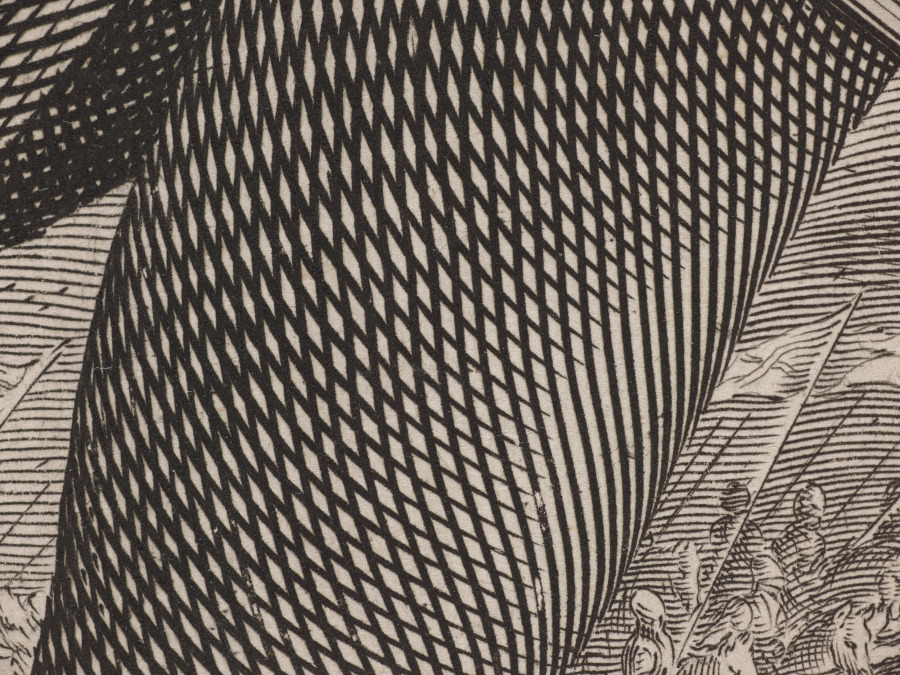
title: Bellona Leading the Armies of the Emperor against the Turks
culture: Netherlands, early 17th Century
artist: Jan Muller (Dutch, 1571–1628)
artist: after Bartholomaeus Spranger (Flemish, 1546–1611)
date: 1600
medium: engraving (printed from two plates)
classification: Print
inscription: lower left, in plate: B. Sprangers invent. / Ioan.Muller.sculp. ; across bottom, in plate: Serenissimo Principi Domino D[n?]o MATHIÆ, Archiduci Austriæ, Duci Burgundiæ, Stiriæ, Carinthiæ, Carniolæ et Wirtembergæ etc. Comiti Tirolis etc. Nec non / Generali et supremo totius Christiani exercitûs contrà Turcas Duci ac Præfecto foelicissimo, D{n?]o suo clementissimo, Bartholomæus Spranger. S.C.M.Pictor D.S. [in engraved script] ; across bottom, in plate: En Bellona ciet turmas procùl ære canôro, / Spicula Marte vibrat dextro, succinctaque flagris / Bella fremit, fremebunda parat, gaudetque paratis. / Nec mora, feruet opus, Iouis ales prælia miscet / Quid dubitet? Bona caussa facit. Caducifer inquit: / Macte animis: caussarum sum Deus ipse bonarum. / Exere tu modò vim facto agmine, Romula pubes. / Terrificum Turcis fulmen, victoria vobis / Nube volans præsto est: nihil impedit, exere vires. / Non ergò differ pacis, Germania, sedes: / Præsidio maiore iuua Iouis alitis ausus. / Sic sternes Mahomet: victrix tua causa triumphet. ; lower right, in plate: Harman. Muller. excud. / Anº 1600. ; VERSO, lower left, in graphite: 78) ; lower right, in graphite: 289/75 ; lower right, in graphite: H 50 I/II ; lower right, in graphite: l- ; lower right, in graphite: 34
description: The central, striding figure, Bellona (the Roman goddess of war), is said to be either the sister or the wife of Mars, god of war. The double-headed eagle of the Habsburgs appears on the flag behind her. Born in Amsterdam, Jan Muller probably learned engraving from his father, Harman Muller, a printmaker and publisher. He traveled to Italy in the 1590s and presumably stopped in Prague along the way. There he made prints based on designs by artists employed at the Habsburg court, including Bartholomeaus Spranger (1546–1611).